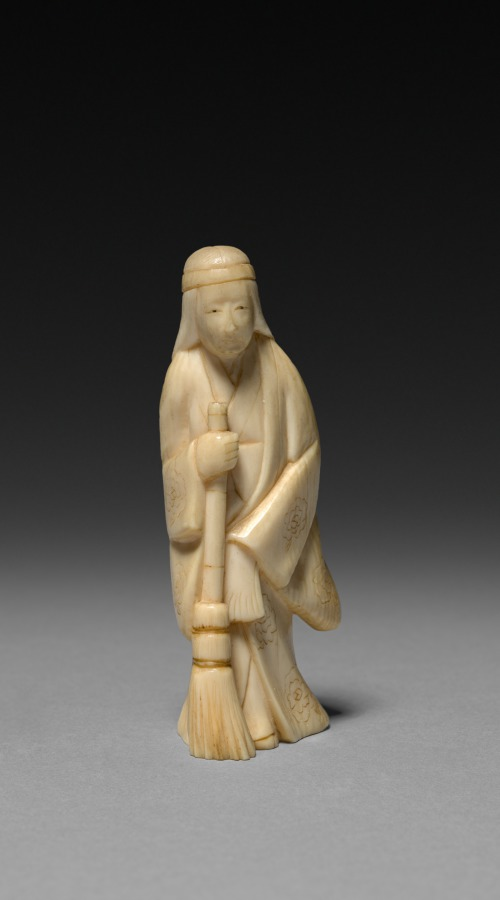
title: Woman with Broom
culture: Japan, Meiji period (1868–1912)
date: early 1900s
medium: ivory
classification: Ivory